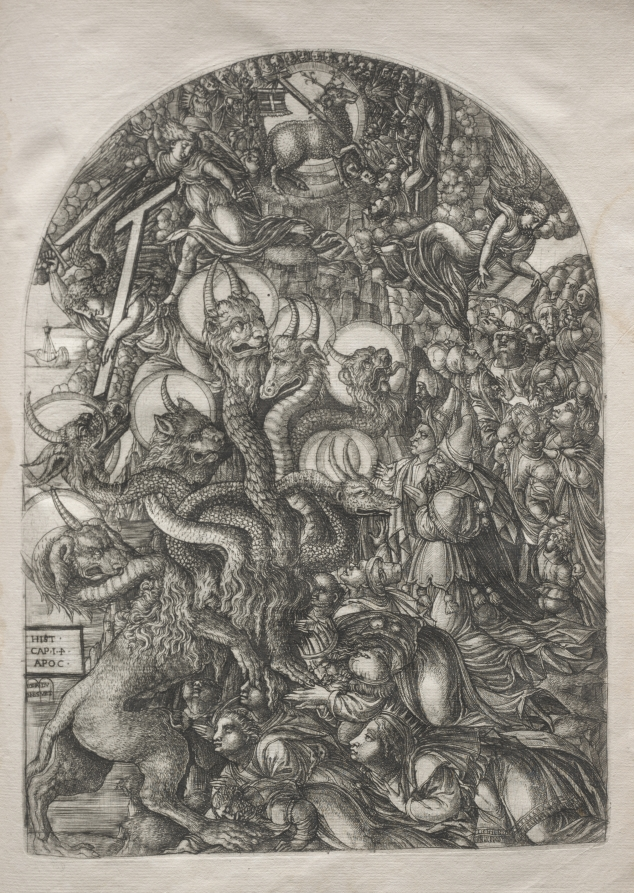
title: The Apocalypse: The Beast with Seven Heads and Ten Horns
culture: France, 16th century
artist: Jean Duvet (French, 1485–1561)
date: 1546–1556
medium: engraving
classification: Print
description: This print is part of a bound volume of works illustrating the a narrative of the Apocalypse, taken from the Revelation of Saint John in the Bible. The 23 engravings in the series occupied the artist for a number of years and represent his greatest artistic achievement. The museum's volume is one of only seven known complete sets. Jean Duvet was one of the first major printmakers in France and one of the most original artists of the 1500s. Although he worked mostly in the provincial city of Langres, he became aware of Italian art through the circulation of prints—notably those of Marcantonio Raimondi. His solidly modeled human figures reflect the influence of the Italian High Renaissance. Duvet, however, developed an idiosyncratic, highly artificial style with crowded compositions that ignore rational space in favor of ornamental surface patterns.